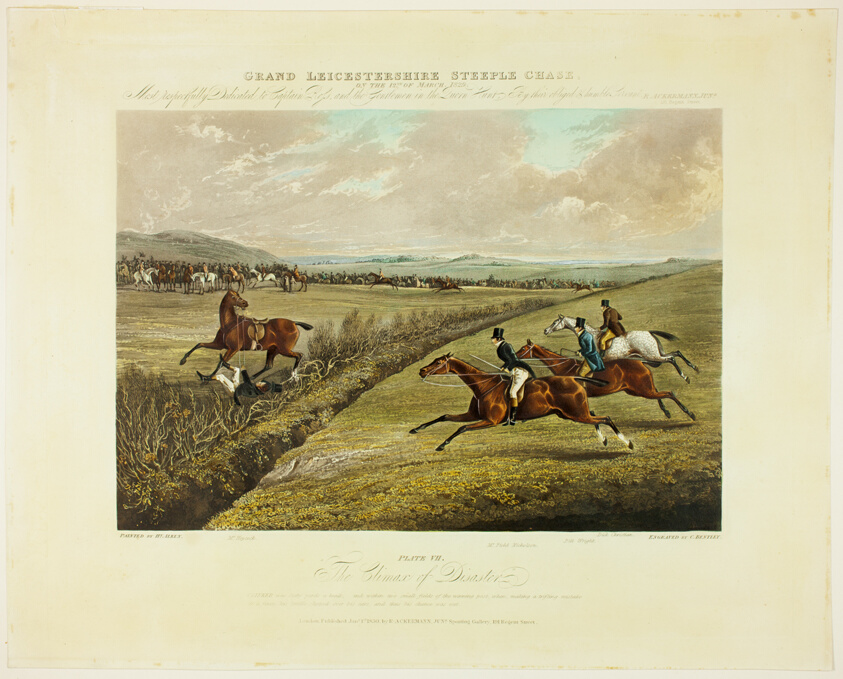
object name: Print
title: Climax of Disaster, from Grand Leicestershire Steeplechase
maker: Charles Bentley (English, 1806-1854); after Henry Alken (English, 1785-1851); published by R.A. Ackermann (English, 1764-1834)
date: published 1830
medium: Color aquatint on paper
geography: England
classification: aquatint; print; prints and drawing